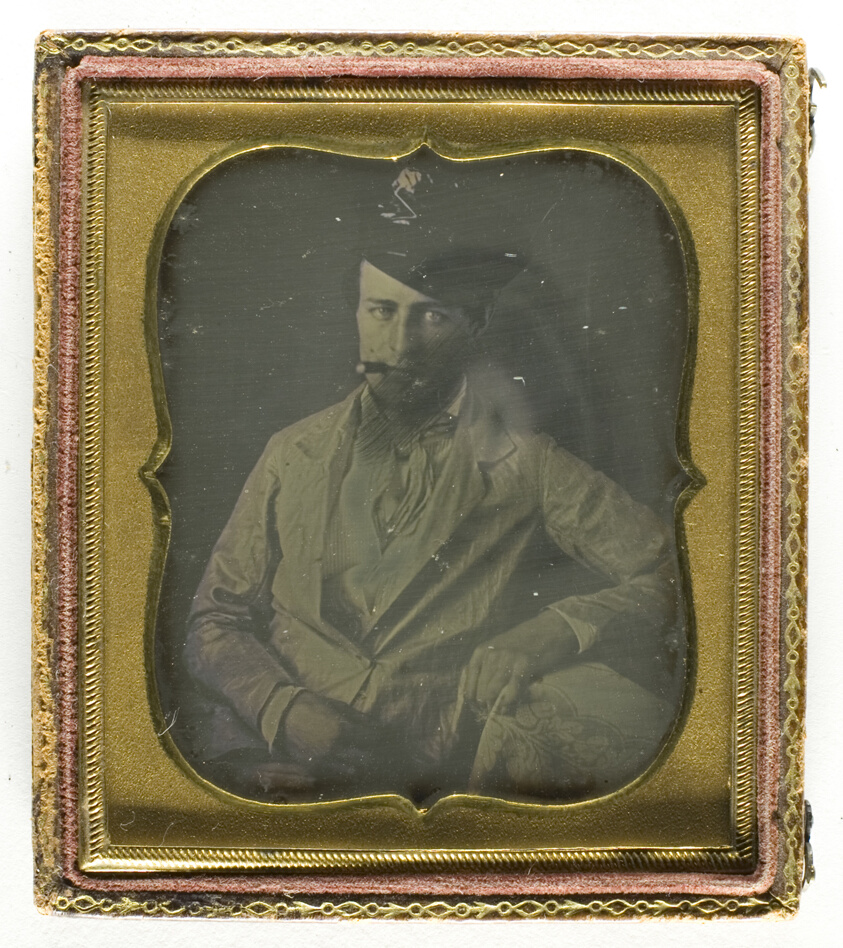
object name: Photograph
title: Untitled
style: 19th century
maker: Artist unknown; 19th century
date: 1839/99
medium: Daguerreotype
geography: Unknown Place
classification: daguerreotype; photographic process; photography; photograph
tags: portraits, portraits: male subject, photography, formal portraits